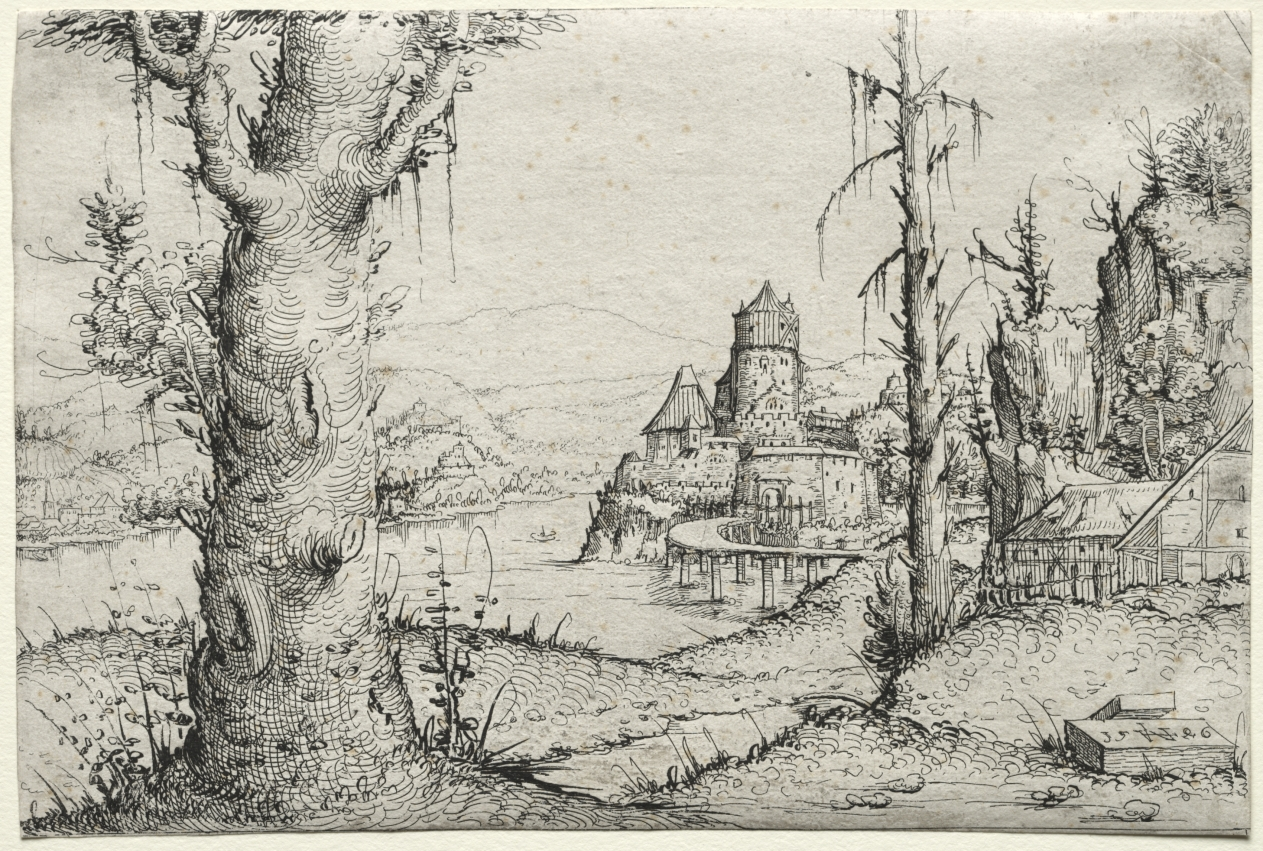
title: River Landscape with Large Tree at Left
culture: Germany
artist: Augustin Hirschvogel (German, 1503–1553)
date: 1546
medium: etching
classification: Print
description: Within a decade, Augustin Hirschvogel and Hanns Lautensack were aware of the landscapes by Wolfgang Huber and Albrecht Altdorfer and began to expand their artistic vocabulary. Hirschvogel probably made this group of etchings after traveling down the Danube from Nuremberg, through Regensburg and Passau, to his residence in Vienna. The many buildings, cultivated fields, and roads emphasize human activity and its mark on the landscape but always in the service of articulating a particular topography. Hirschvogel’s etchings found an international audience, informing the development of the landscape genre as far away as Italy and the Netherlands.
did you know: The artist's initials, "AH," and the date "1546" appear on a rendering of a flat stone tablet in the image, as if engraved into the rock.